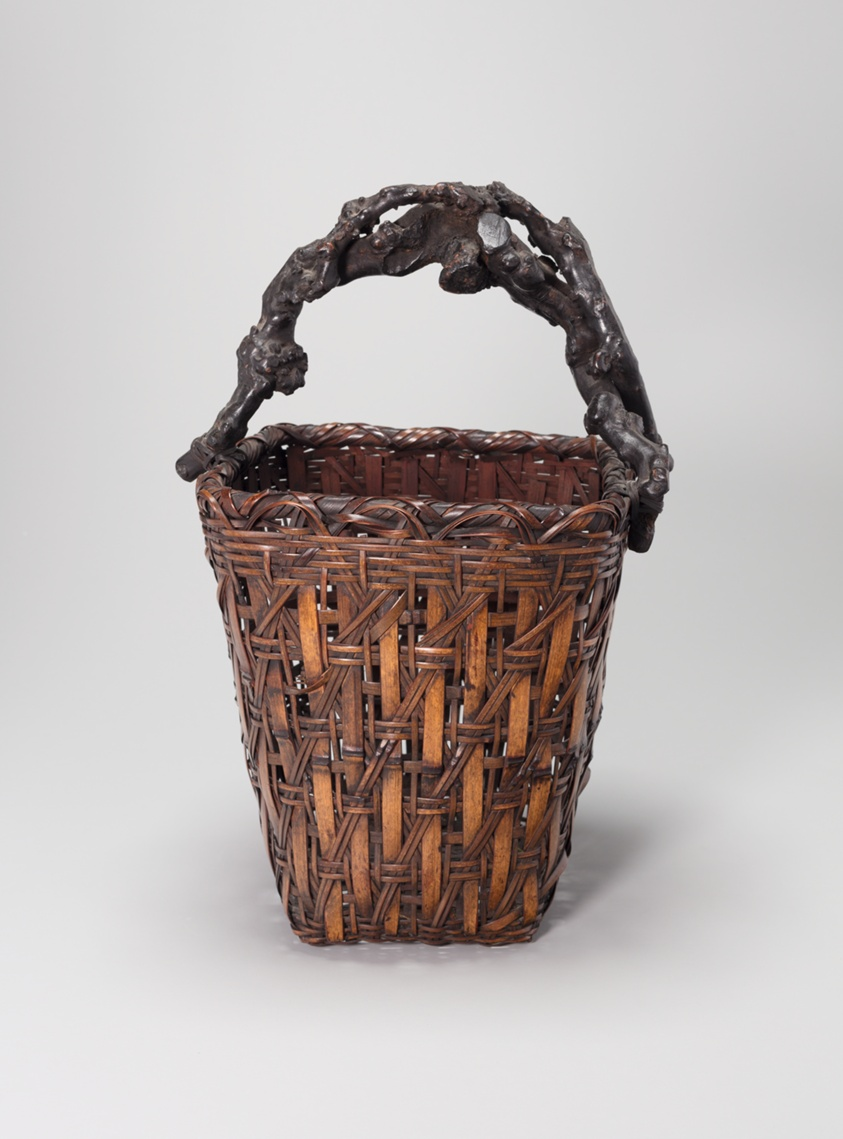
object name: Decorative Arts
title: Rectangular Flower Basket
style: Japanese (culture or style)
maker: Japan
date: c. 1900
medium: Bamboo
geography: Japan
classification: basketry; decorative arts